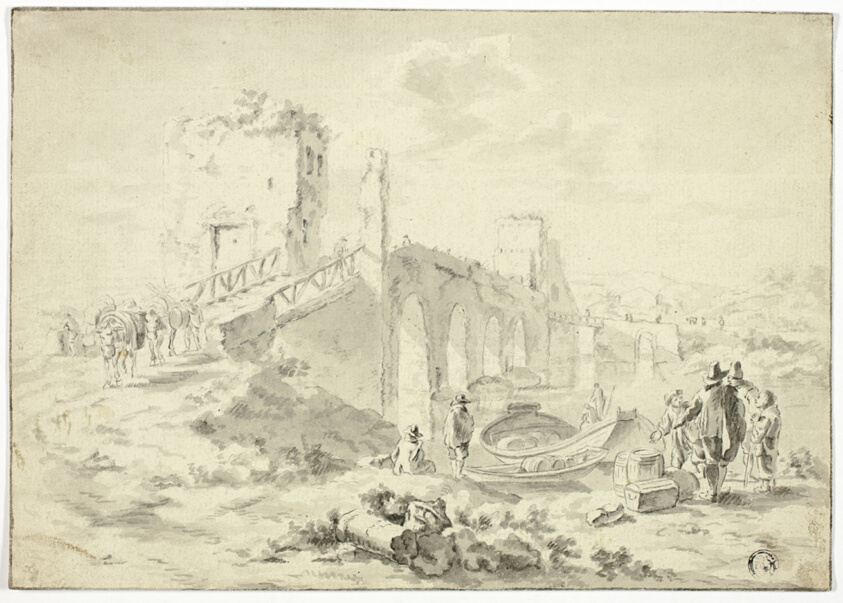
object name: Drawing and Watercolor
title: Figures Crossing Stone Bridge Above Boat Ferrying Barrels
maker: After Andries Dirksz Both (Dutch, 1611-1641); or Nicolaes Berchem (Dutch, 1620-1683)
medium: Brush and gray wash, with graphite, on cream laid paper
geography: Holland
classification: ink or chalk wash; drawings (visual works); prints and drawing